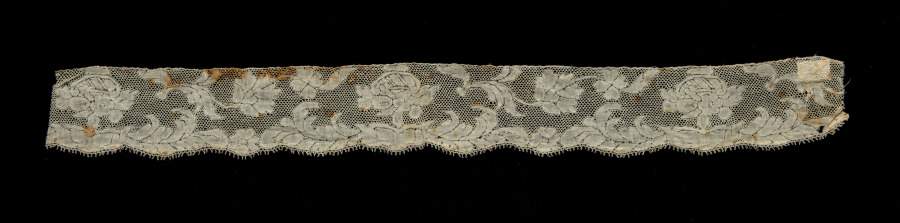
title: Lace Edging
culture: France, Valenciennes or Flanders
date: 1700s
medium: Linen: bobbin lace (Valenciennes)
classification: Lace